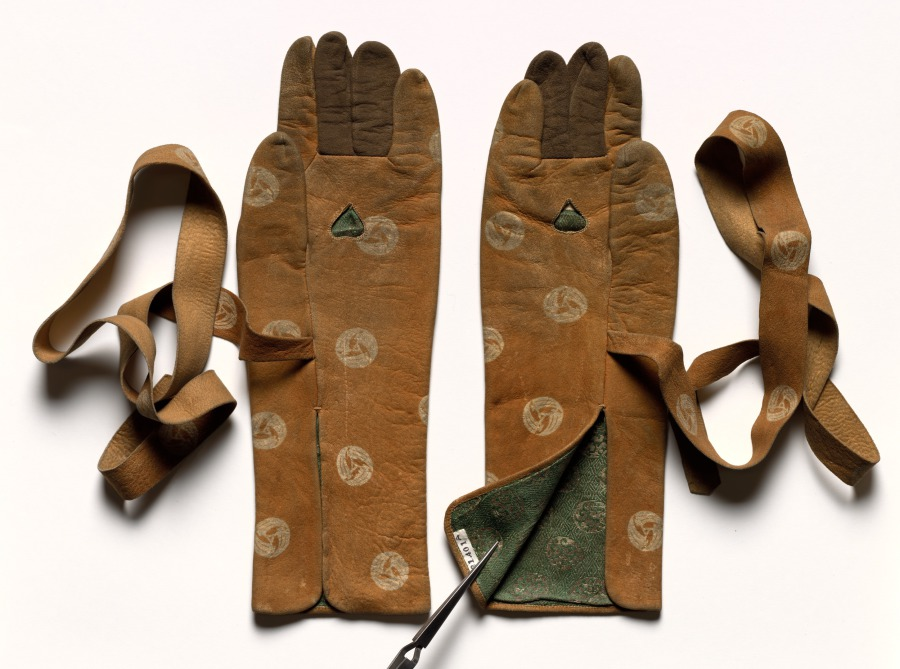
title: Pair of Archer's Gloves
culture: Japan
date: 1800s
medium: chamois leather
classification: Garment